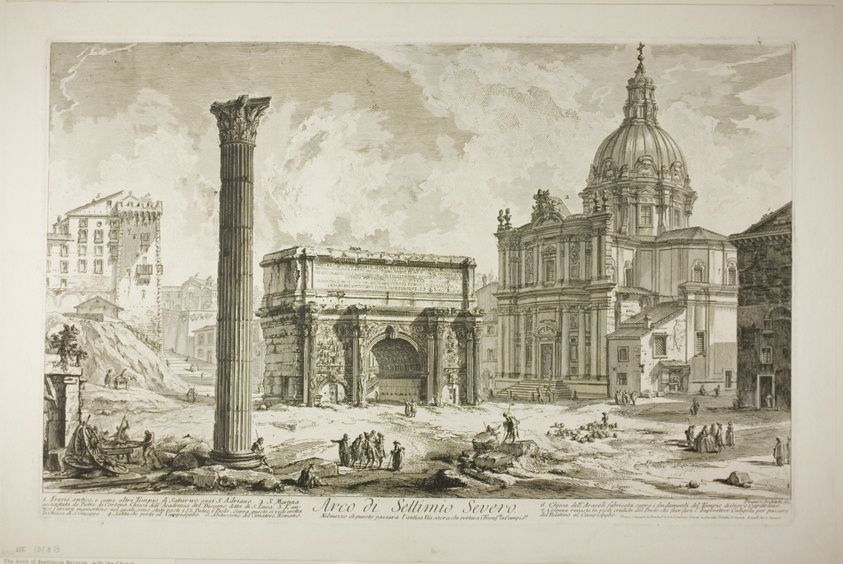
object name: Print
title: Arch of Septimius Severus through which passed the ancient Sacred Way, bringing victors to the Capitol, from Views of Rome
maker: Giovanni Battista Piranesi (Italian, 1720-1778)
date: 1750/59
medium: Etching on heavy ivory laid paper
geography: Italy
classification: etching; print; prints and drawing